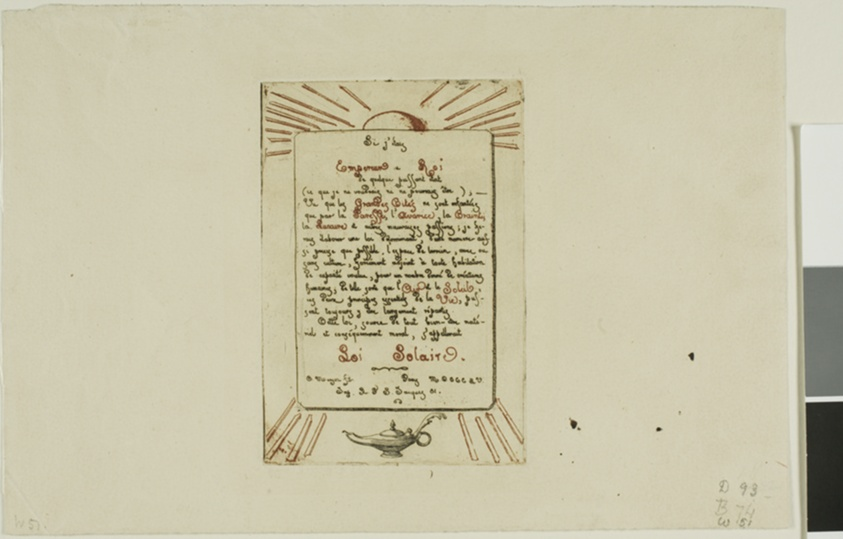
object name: Print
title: Solar Law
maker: Charles Meryon (French, 1821-1868)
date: 1855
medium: Etching, from two plates, one printed in warm black, the other in red ink, on ivory wove paper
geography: France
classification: etching; print; prints and drawing